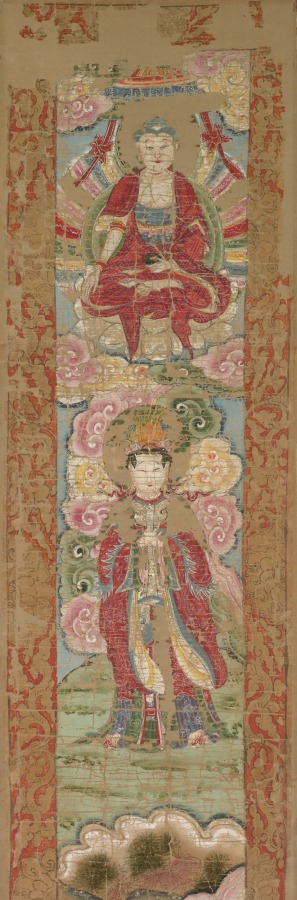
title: Buddhist Panel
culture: China or Korea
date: 1600s–1700s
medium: Hanging scroll; ink and color on paper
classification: Painting